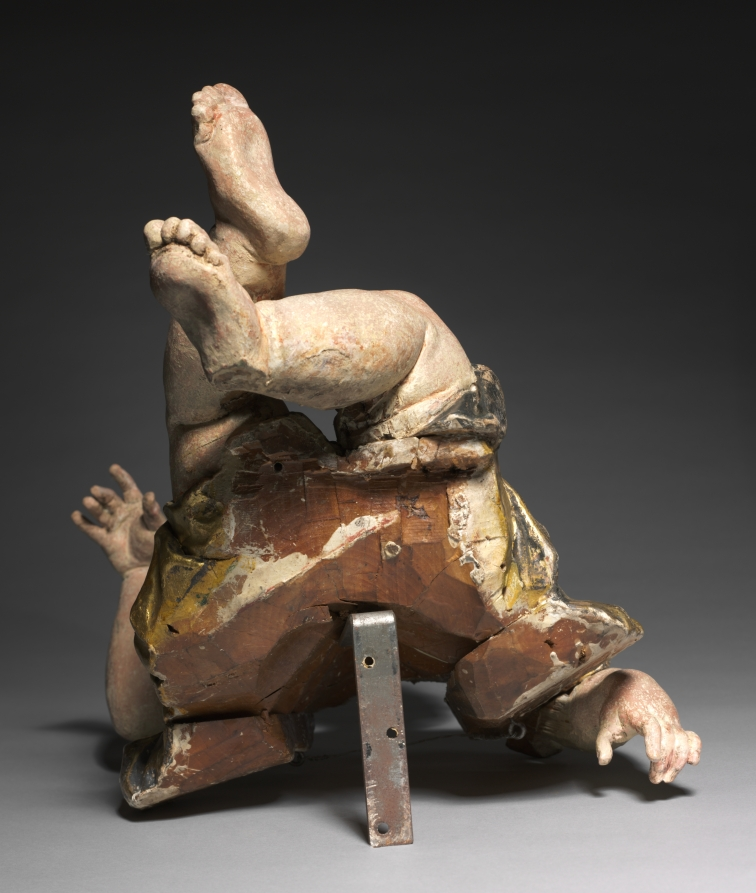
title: Putto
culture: Germany, near Bamberg, 18th century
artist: Ferdinand Tietz (Austrian, 1708–1777)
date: mid-1700s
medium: painted and gilded wood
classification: Sculpture